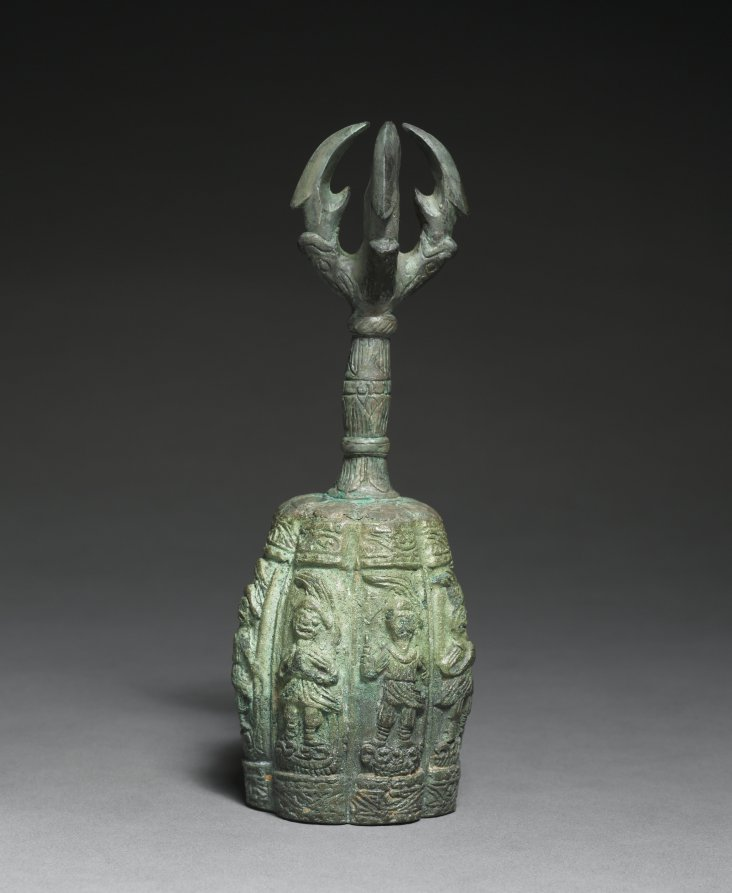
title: Buddhist Ritual Bell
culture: Korea, Goryeo dynasty (918–1392)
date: 1300s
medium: bronze; with incised designs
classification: Metalwork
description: This Buddhist ritual bell is called the "five-pronged" bell due to the four prongs bending toward a central prong at the end of the handle. This shape is a vajra, or lightning bolt, a powerful and important symbol in esoteric Buddhism, which originated in India, spread across Asia, and was practiced in Korea.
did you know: Called a vajra in Sanskrit, this implement is used in Buddhist rituals meant to destroy ignorance.